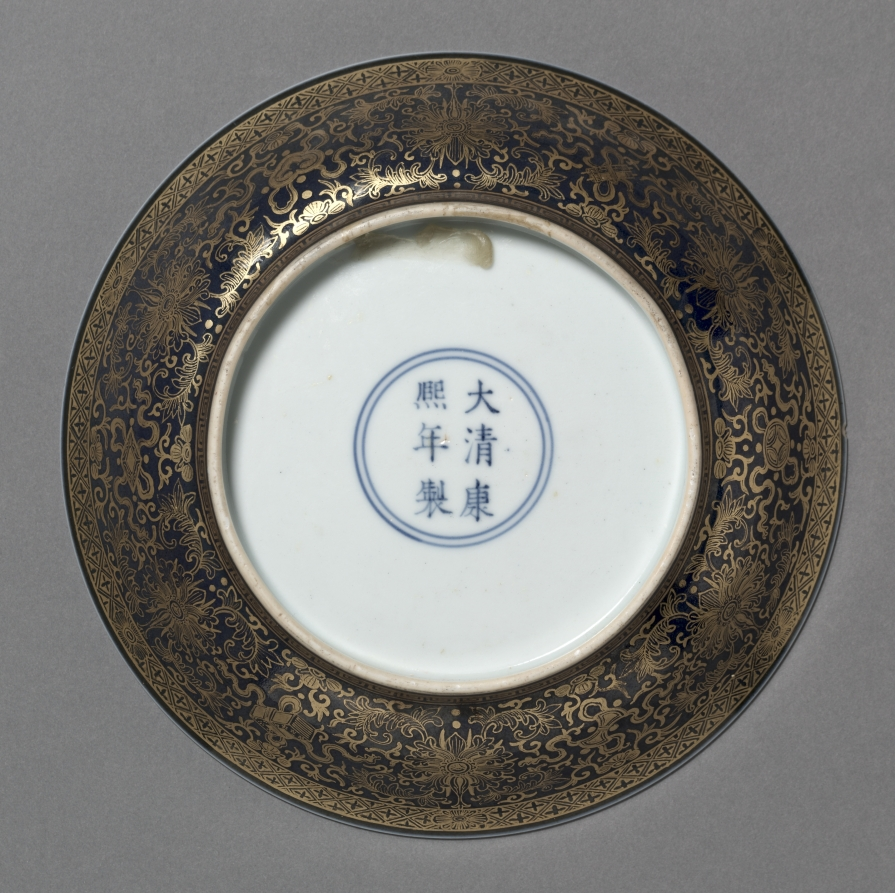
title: Dish with Zhang Guolao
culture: China, Jiangxi province, Jingdezhen kilns, Qing dynasty (1644-1911), Kangxi reign (1662-1722)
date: 1662–1722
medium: porcelain with famille verte overglaze enamel and painted gold decoration (interior) and powder blue glaze with painted decoration (exterior)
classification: Ceramic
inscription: 大清康熙年製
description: Zhang Guolao, featured on this dish, is one of the Eight Immortals and a gifted magician who was believed to know the secret arts to obtain longevity. Typically depicted as an old man and accompanied by his mule, he is the patron saint of artists. His mule is said to be magical; it can be folded up like a piece of paper to fit into a small bag. The central scene is framed by a sumptuously gold-decorated rim showing spaces reserved for landscape scenes in primarily fresh blue and green colors.